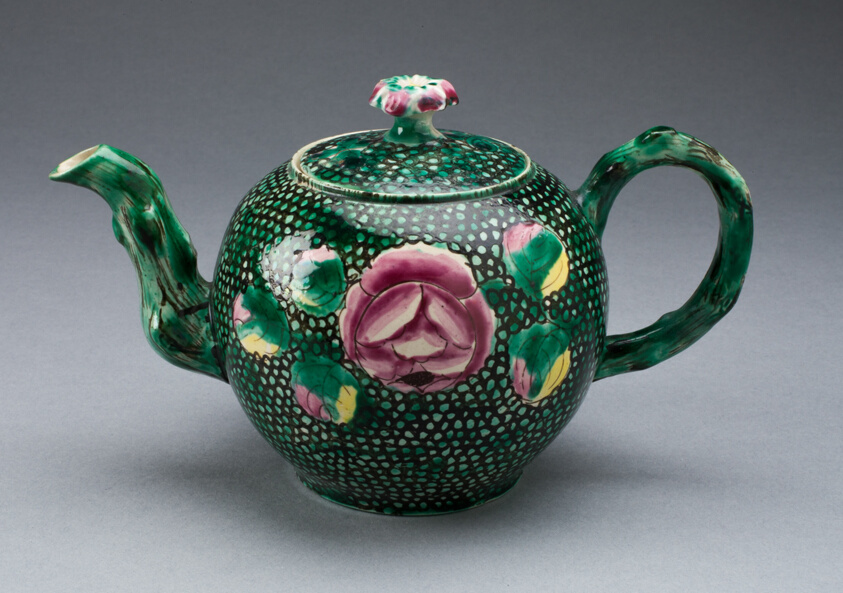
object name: Ceramics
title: Teapot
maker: Staffordshire, England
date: c. 1760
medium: Salt-glazed stoneware, polychrome enamels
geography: Staffordshire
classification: teapot; european decorative arts; ceramics; stoneware; salt-glazed stoneware